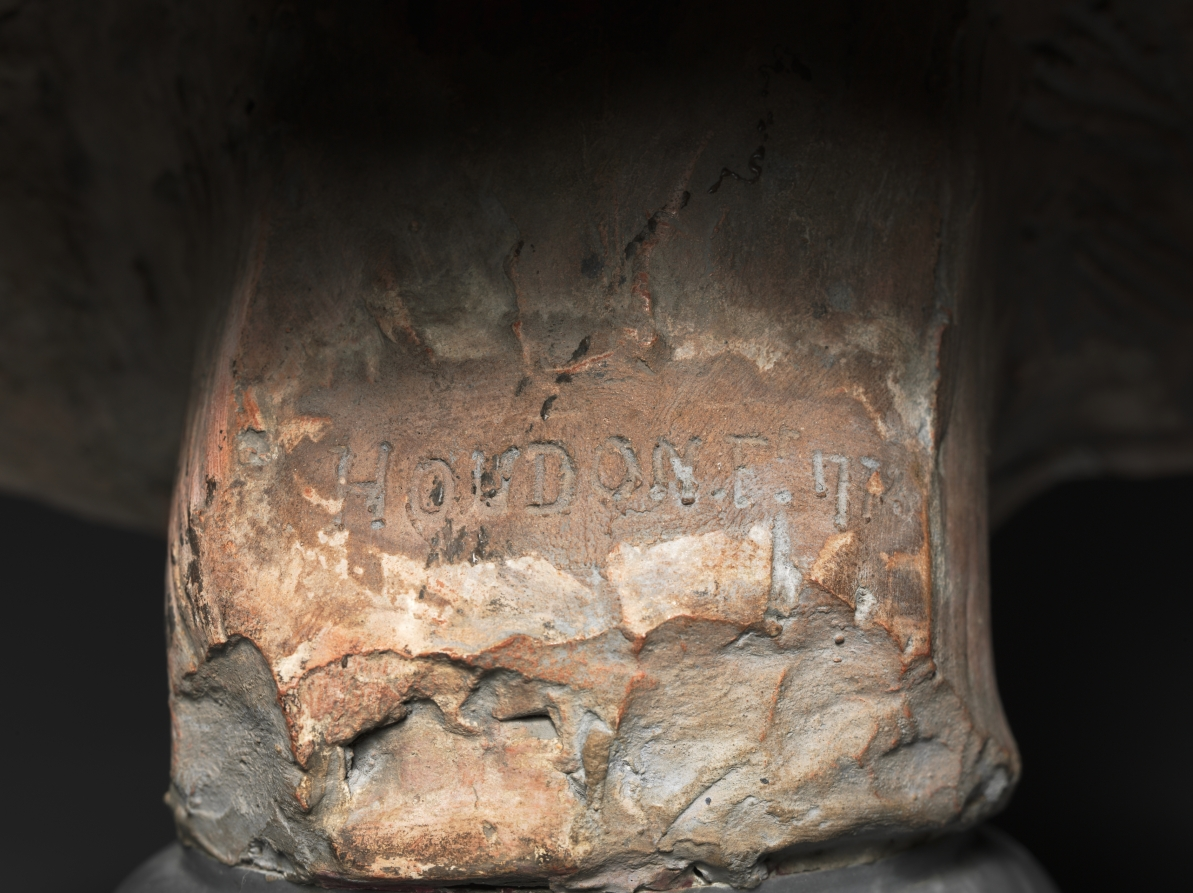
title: Portrait of Christoph Willibald Gluck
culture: France, 18th century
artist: Jean-Antoine Houdon (French, 1741–1828)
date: c. 1775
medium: terracotta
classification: Sculpture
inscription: inscribed in plaster fill in back at bottom: Houdon FT 177[4?]. Since this inscription was clearly added after the terracotta was fired, it cannot be considered a signature.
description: A well-known composer of the 1700s, Gluck reformed opera by bringing unprecedented simplicity and sincerity to his music and staging, qualities shared by Houdon’s bust. This portrait, by depicting Gluck’s pockmarked face, was perceived as a natural and truthful representation. Yet, he would never have appeared publicly with unkempt hair and an open collar, which constituted the standard for representing an artist.